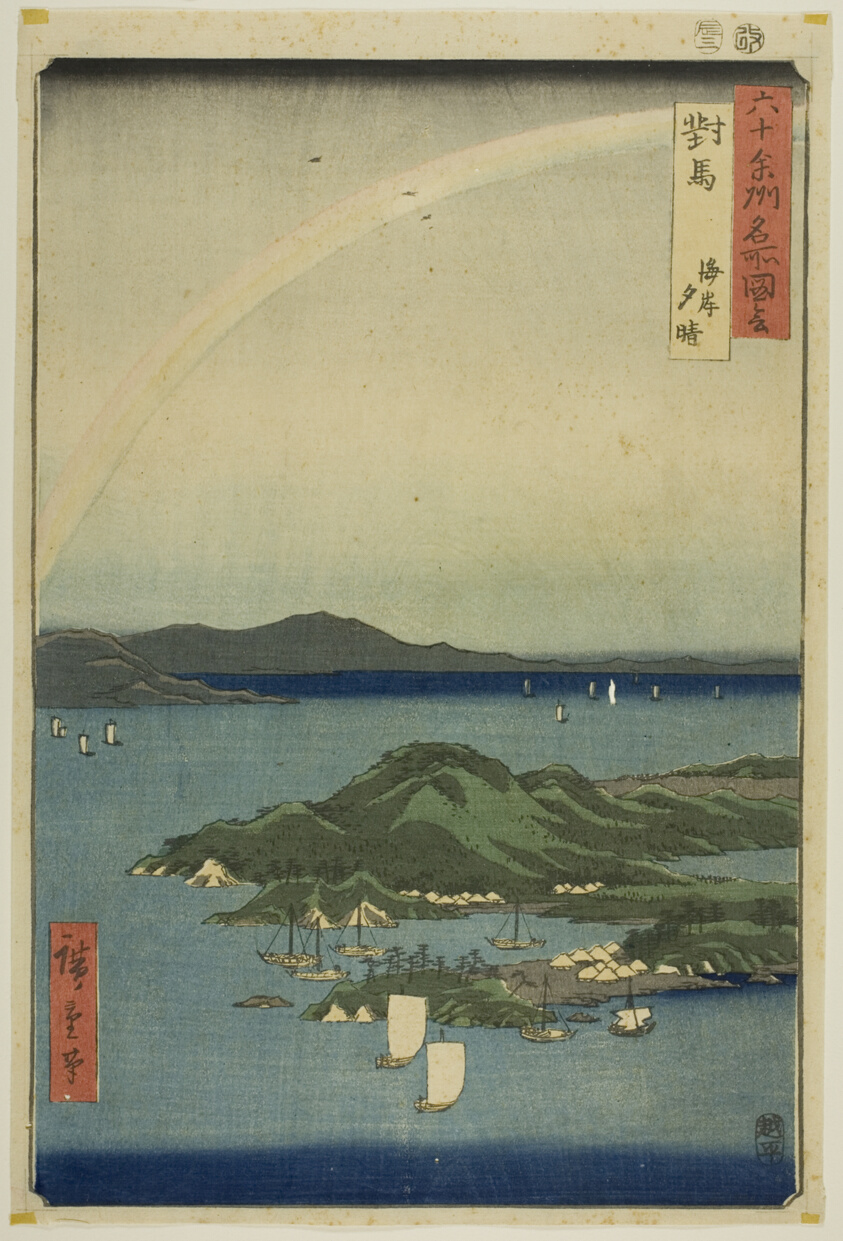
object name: Print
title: Tsushima Province: Clear Evening on the Coast (Tsushima, kaigan yubare), from the series "Famous Places in the Sixty-odd Provinces (Rokujuyoshu meisho zue)"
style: Japanese (culture or style)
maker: Utagawa Hiroshige 歌川 広重; Japanese, 1797–1858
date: 1856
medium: Color woodblock print; oban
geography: Japan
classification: woodblock print; print